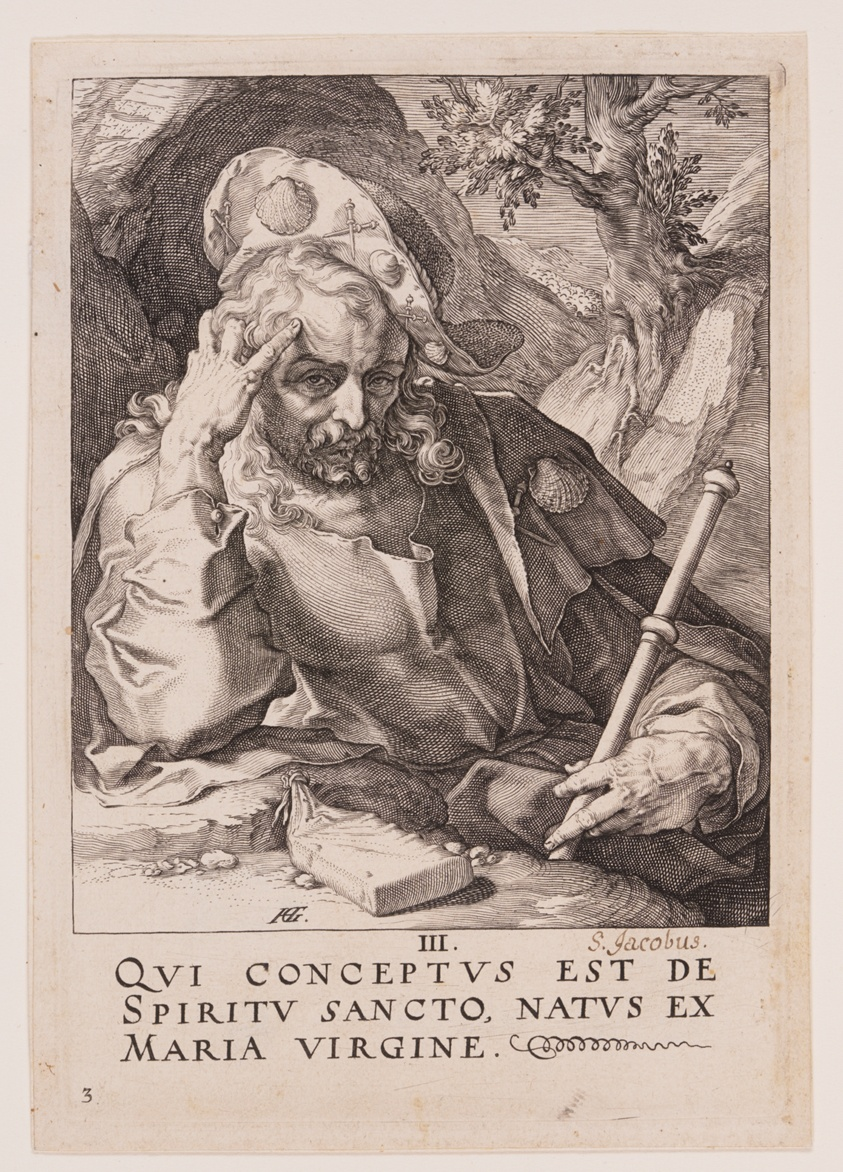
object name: Print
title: St James the Great, from Christ, the Apostles and St Paul with the Creed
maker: Hendrick Goltzius (Dutch, 1558–1617)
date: 1589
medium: Engraving on ivory laid paper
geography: Netherlands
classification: engraving; paper; print; prints and drawing